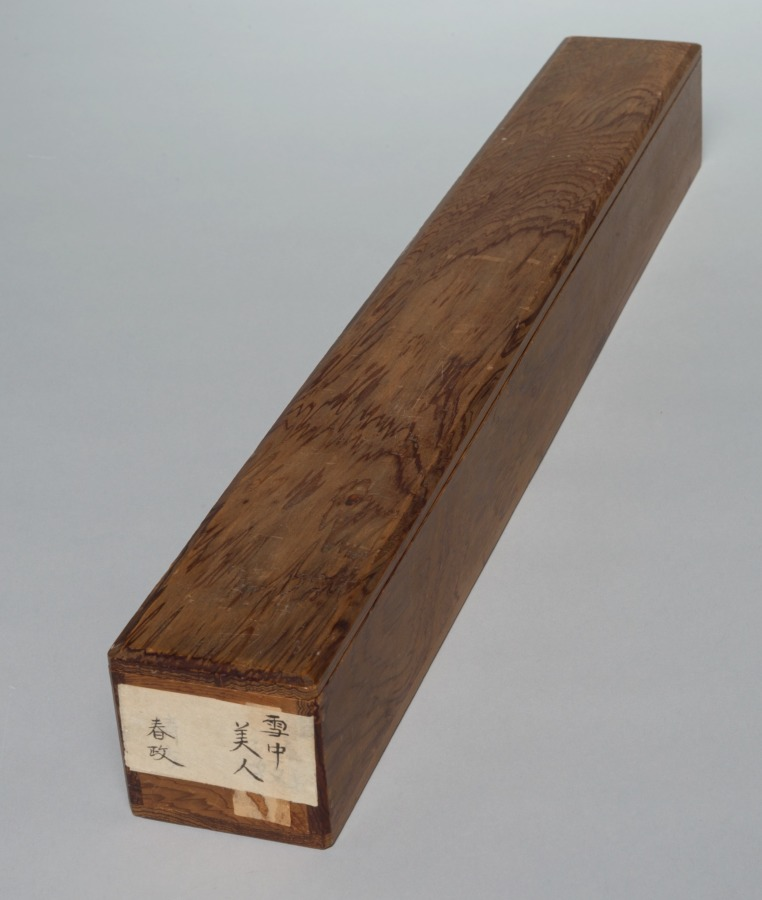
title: Lady with a Parasol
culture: Japan, Edo period (1615–1868)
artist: Koikawa Harumasa (Japanese)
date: early 1800s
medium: hanging scroll; ink, color, gold, and silver pigments on paper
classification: Painting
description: This painting depicts a young woman braving the elements as she hurries home from the local bathhouse. The action depicted accentuates her slender neck and bare legs. In later Japanese art, images of beautiful women in bare feet and a towel between their teeth have sensual overtones.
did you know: Spatters of white paint represent falling snow.